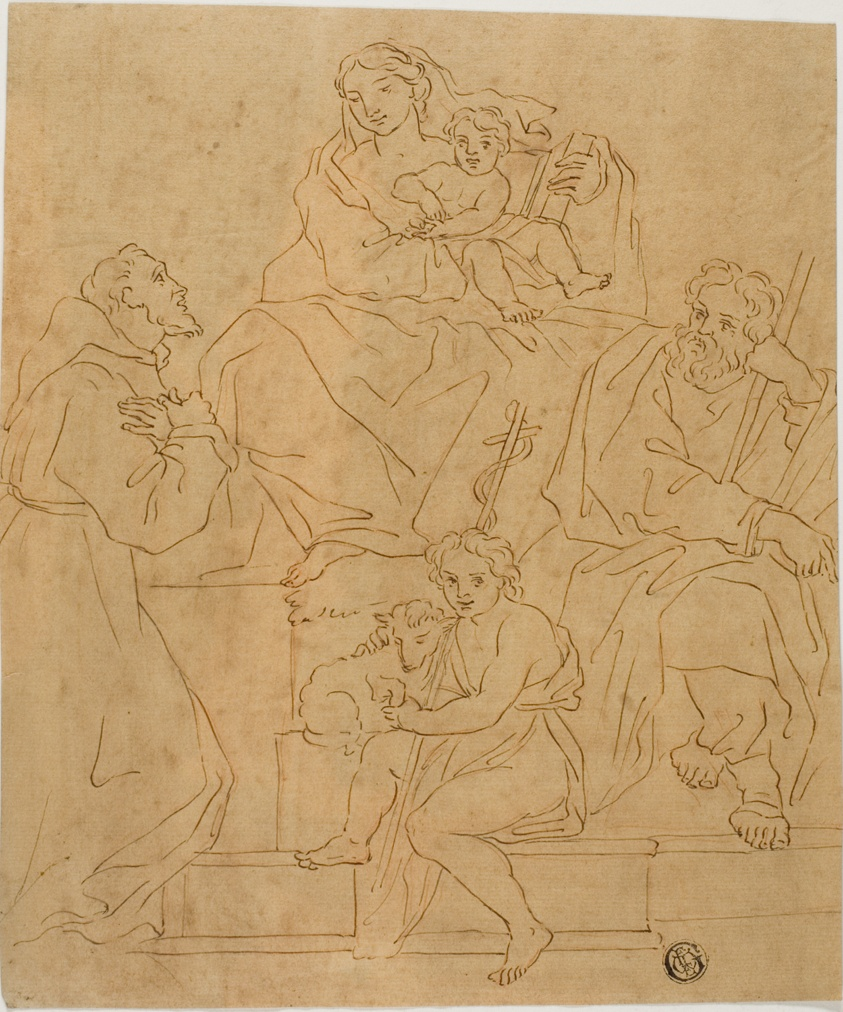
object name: Drawing and Watercolor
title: Holy Family with Saint Francis of Assisi and the Infant John the Baptist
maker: After Jacopo Cavedone; Italian, 1577-1660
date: after 1612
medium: Pen and brown ink, with traces of red chalk, on tan laid paper, laid down on green wove paper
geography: Italy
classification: pen and ink drawings; drawings (visual works); prints and drawing